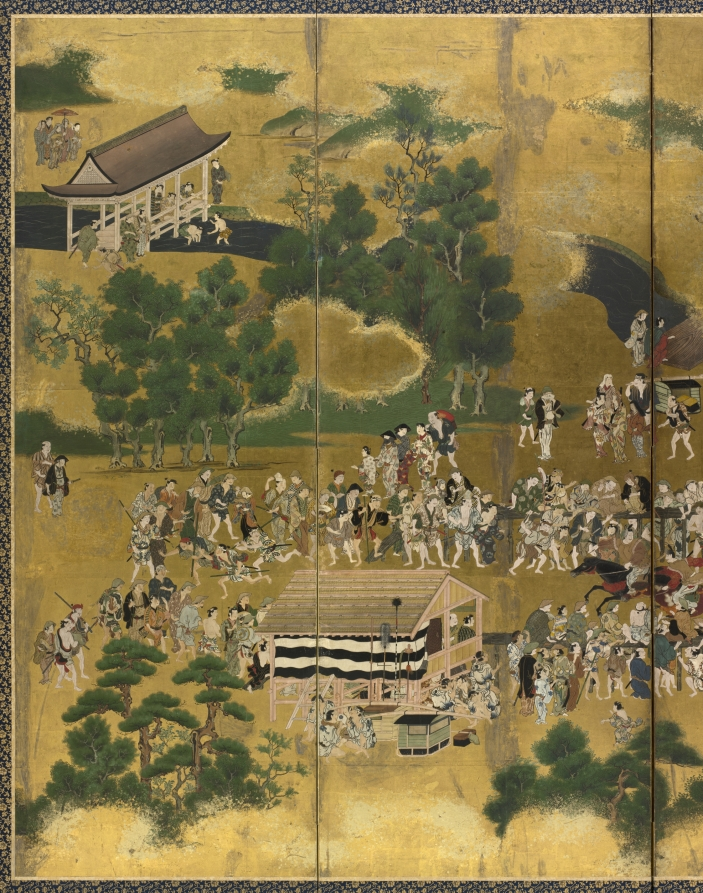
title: Horse Race at the Kamo Shrine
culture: Japan, Edo period (1615–1868)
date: early to mid-1600s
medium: One of a pair of six-panel folding screens; ink and color on gilded paper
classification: Painting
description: Kamo Shrine in Kyoto, seen in the upper half of the left screen, has held an annual horse race on May 5th since the ninth century. Serving as a snapshot of the festivities, this pair of screens captures nearly 600 people watching the race, beginning at the bottom part of the right screen and continuing to the left. The race is a great spectacle where aristocratic riders cling to their fast and unwieldy mounts. While many of those in attendance seem in rapt attention to the main event, other vignettes depict people engaged in an array of activities. This pair of screens was likely originally part of a group of linked murals.